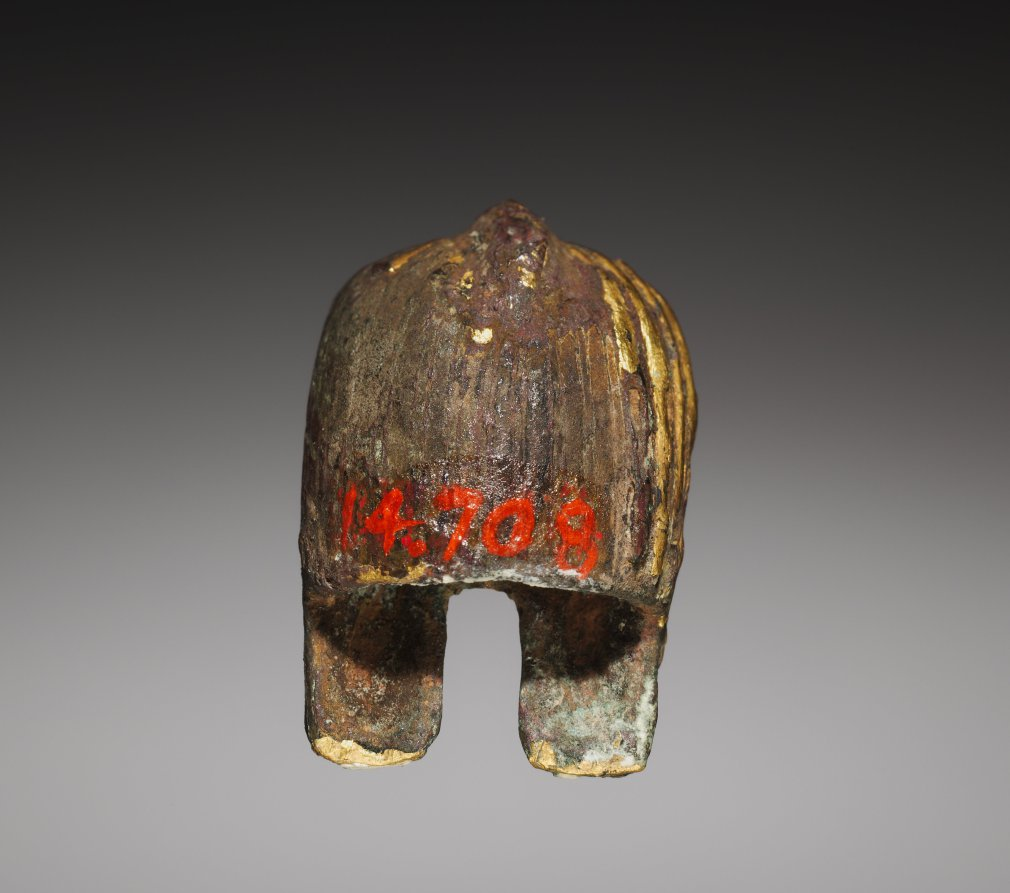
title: Falcon's Head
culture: Egypt, New Kingdom (1540–1069 BCE), Dynasties 18–19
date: 1350–1250 BCE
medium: face of bronze inlaid with gilt copper, wig of black copper (?) with copper striations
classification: Sculpture